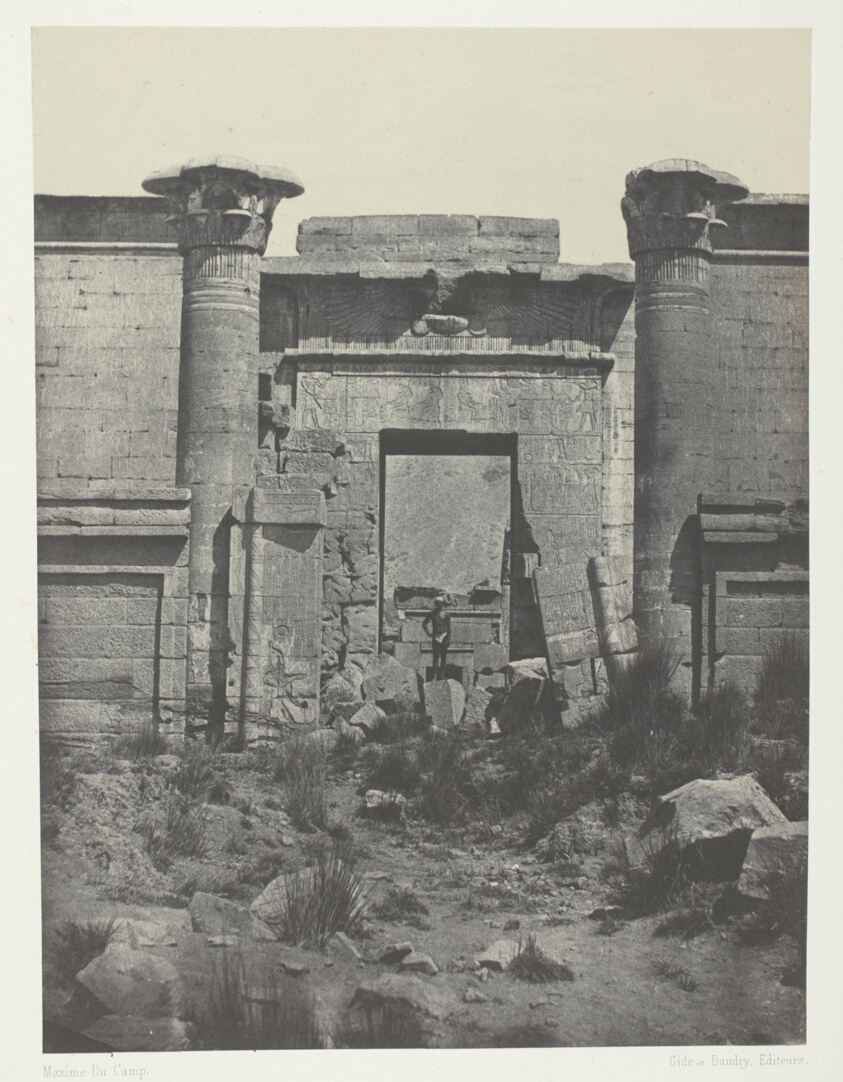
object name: Photograph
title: Médinet-Habou, Propylées du Thoutmoseum; Thèbes, plate 47 from the album "Egypte, Nubie, Palestine et Syrie" (1852)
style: 19th century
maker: Maxime Du Camp (French, 1822–1894)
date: 1849/51, printed 1852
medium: Salted paper print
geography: France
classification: salted paper print; photographic process; photography; photograph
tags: Collected by Hugh Edwards, Egypte, Nubie, Palestine et Syrie